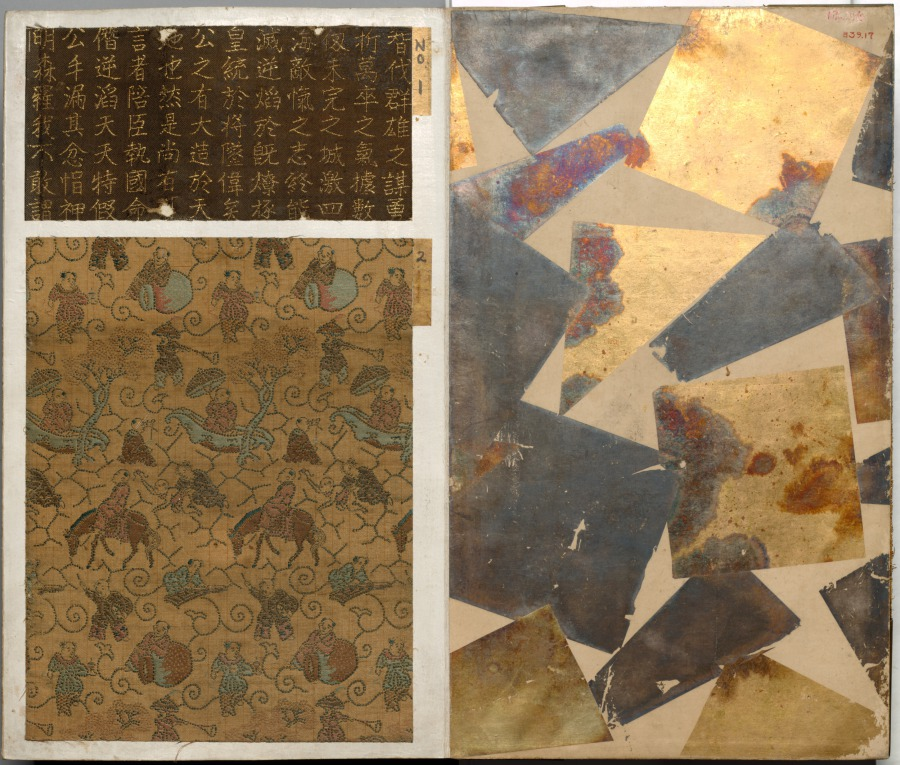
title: Album of Textile Samples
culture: Japan, Edo period (1615–1868)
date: 1600s-1700s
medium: silk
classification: Textile